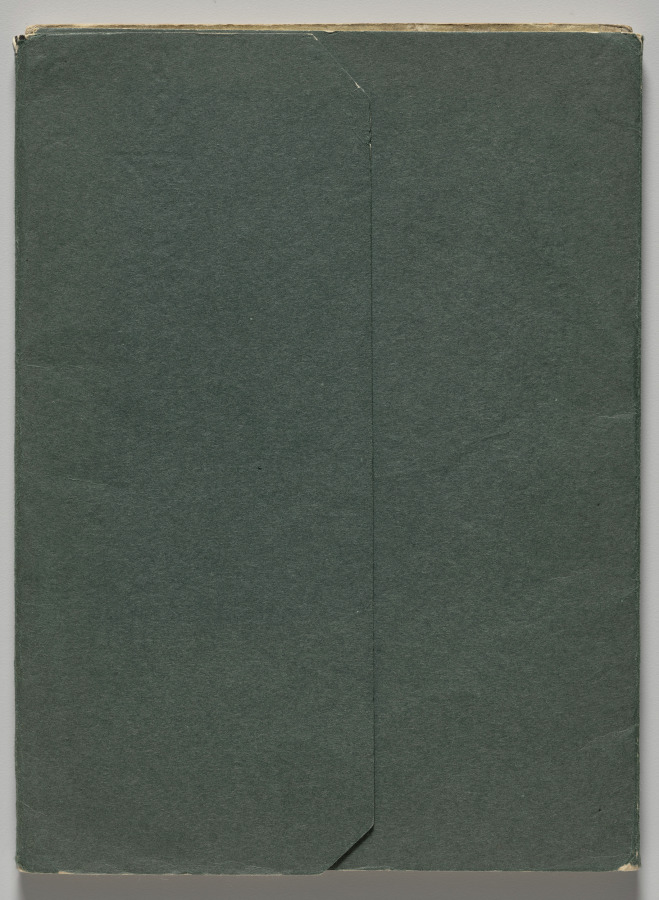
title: The Kōrin Picture Book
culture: Japan, Edo period (1615–1868)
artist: Nakamura Hōchū (Japanese, d. 1819)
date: 1800s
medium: Set of two woodblock printed folding-books; ink and color on paper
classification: Bound Volume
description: Nakamura Hōchū prized the design acumen of earlier painter Ogata Kōrin (1658–1716) and honored him with this two-volume set of woodblock printed images. While Hōchū sampled the original compositions from Kōrin’s works, the prints in these books are heavily inflected with his own loose, whimsical drawing style.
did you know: This set of books is in the orihon, or folding-book format.